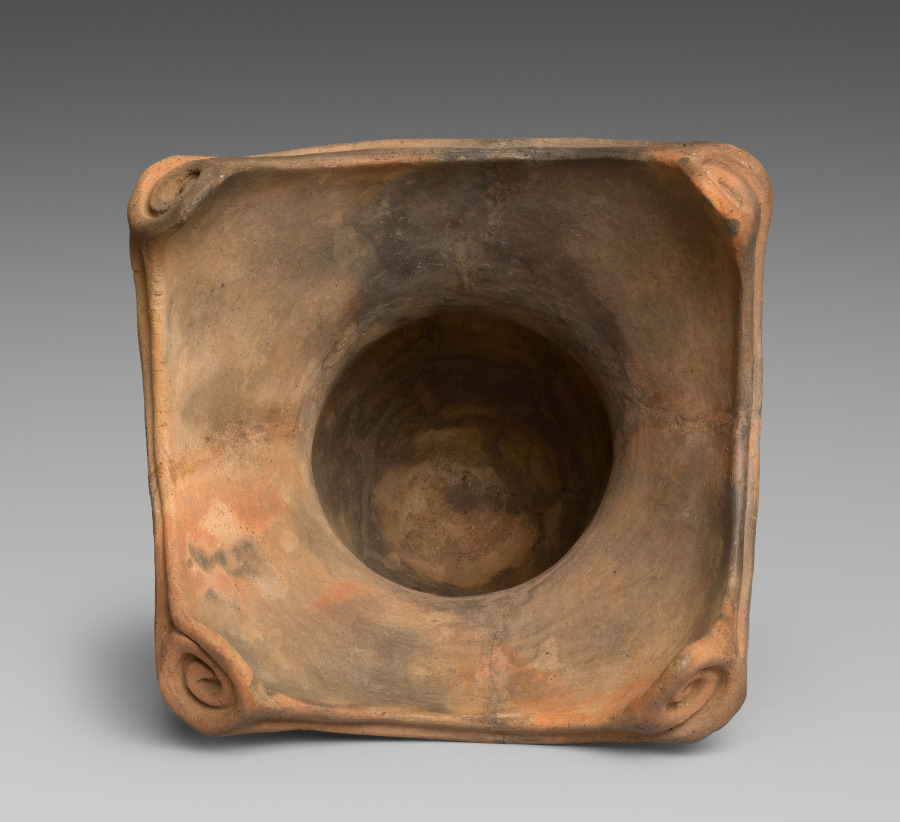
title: Deep Vessel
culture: Japan, Jōmon period (c. 10,500–300 BCE)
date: c. 2500 BCE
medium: Earthenware with impressed and carved decoration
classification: Ceramic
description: This cooking vessel was formed by piling coils of clay atop one another, smoothing and thinning the walls, and then adding surface decoration. Vertical incised squiggle lines as well as diagonal impressed cord patterns create texture. The mouth rises in four dramatic triangular forms, each with a coiled design inside.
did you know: Jōmon, impressed rope patterns, are typical of vessels of this era, so archaeologists named the period after them.